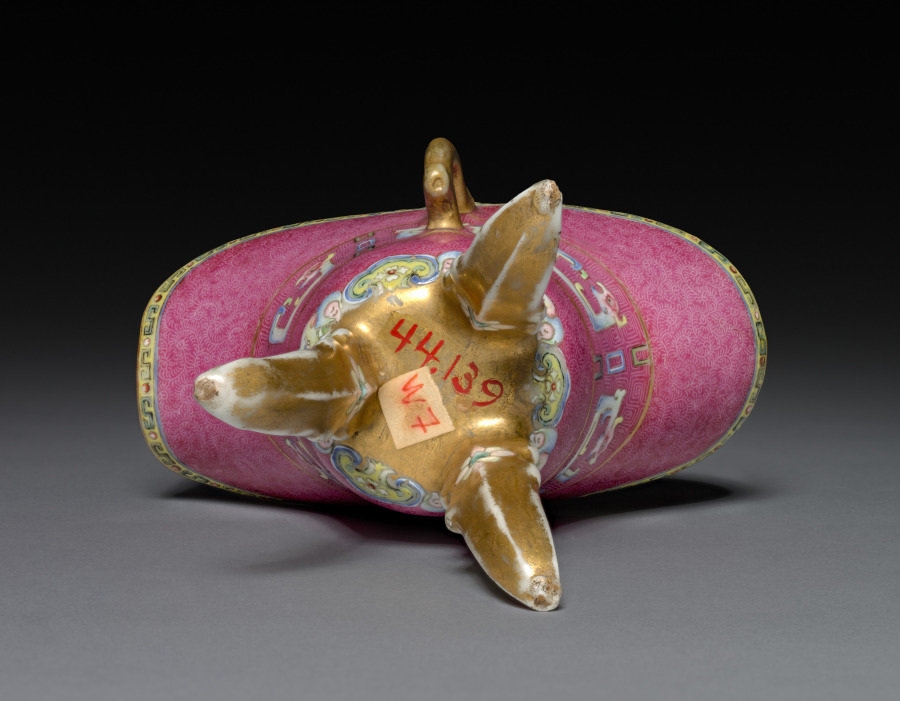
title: Libation Cup of Bronze Format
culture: China, Qing dynasty (1644-1911)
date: 1800s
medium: porcelain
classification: Ceramic